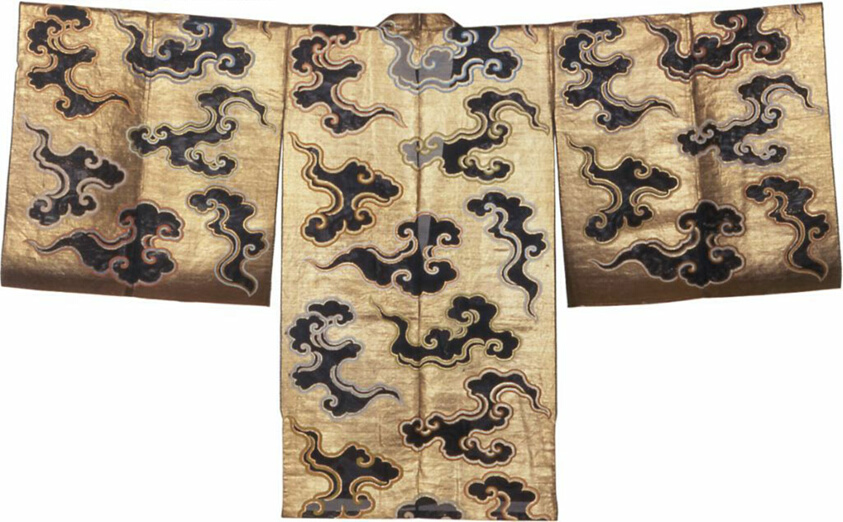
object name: Textile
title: Unusual Ôsodemone-Style Garment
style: late edo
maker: Japan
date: late Edo period (1789–1868), 1801/25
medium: Silk and gold-leaf-over-lacquered-paper strips, complex gauze weave with supplementary brocading wefts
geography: Japan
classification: textile; weaving; kimonos